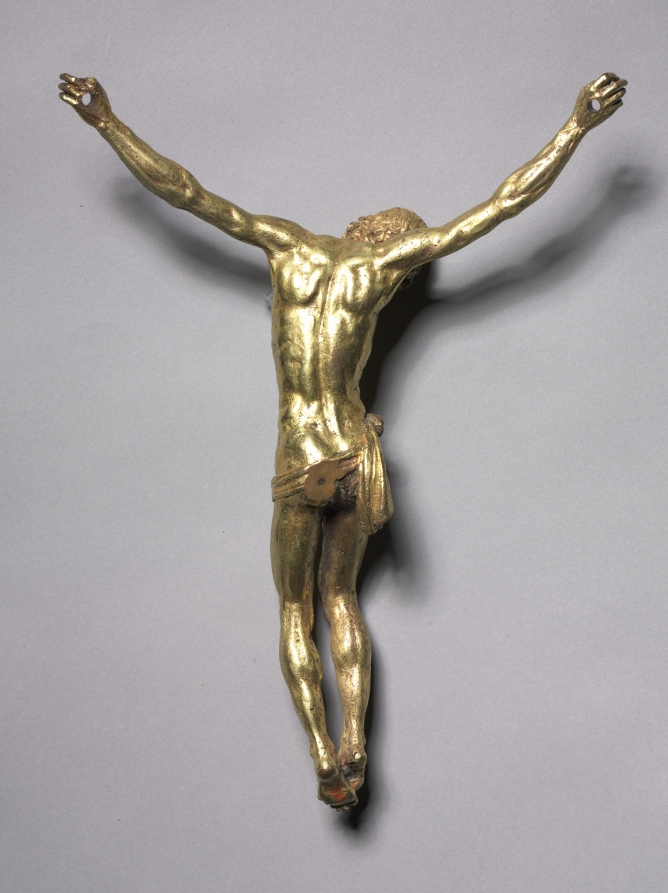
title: Crucified Christ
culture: Italy, 17th or 18th century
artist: cast after a model by Giambologna (Flemish, active Italy, 1529–1608)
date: 1600s or 1700s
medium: bronze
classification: Sculpture